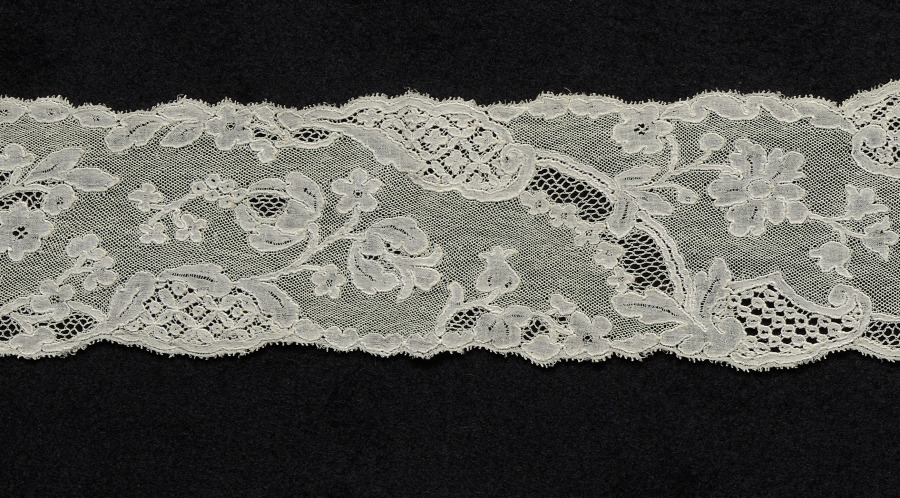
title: Lace Lappet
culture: Belgium, Mechelen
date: 1700s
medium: Linen: bobbin lace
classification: Lace